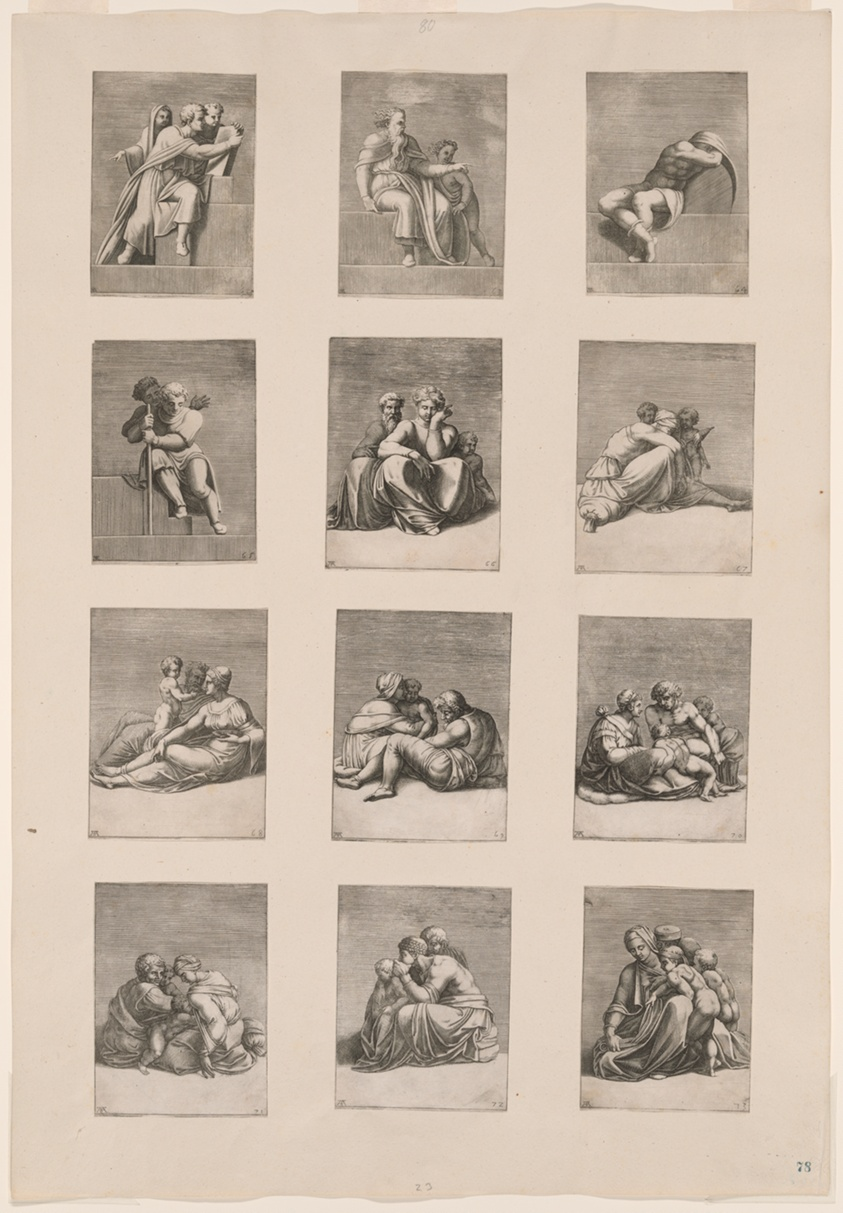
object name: Print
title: Figures from the Ceiling of the Sistine Chapel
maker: Adamo Scultori (Italian, c. 1530–1585); after Michelangelo Buonarroti (Italian, 1475–1564)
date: 1550/65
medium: 12 engravings in black on cream laid paper, tipped onto album sheet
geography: Italy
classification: engraving; paper; prints and drawing; print